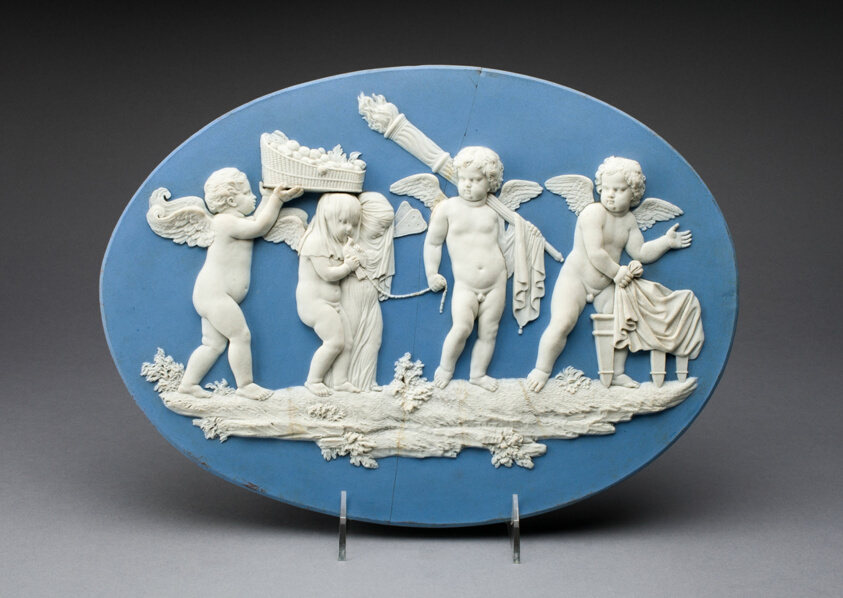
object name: Ceramics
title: Plaque with Marriage of Cupid and Psyche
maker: Wedgwood Manufactory (England, founded 1759)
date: 1787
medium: Stoneware (jasperware)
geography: Burslem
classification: sculpture; stoneware; european decorative arts; ceramics